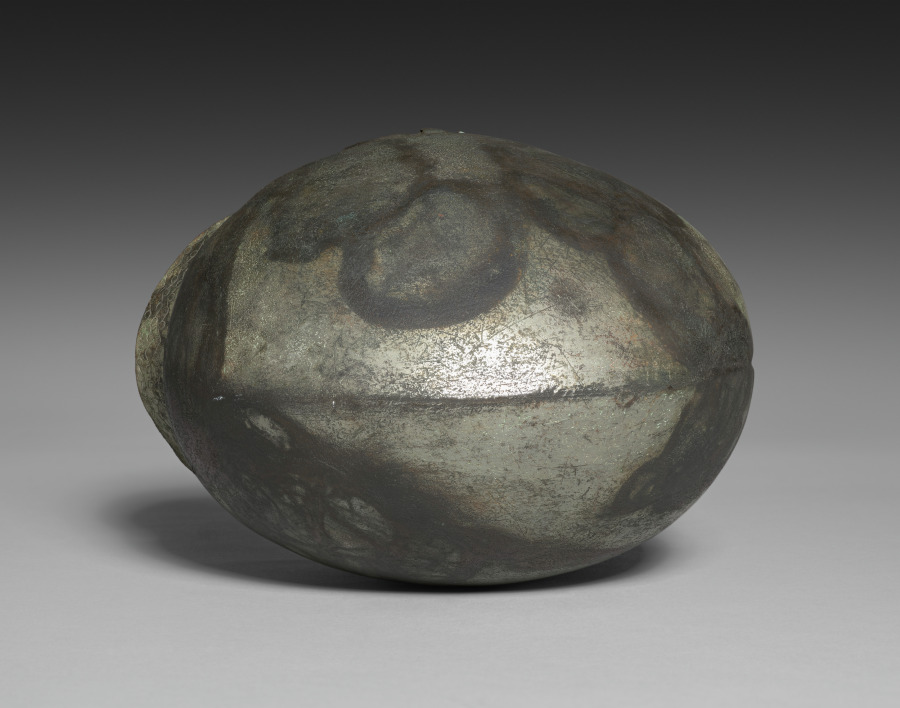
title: Chalcidian Helmet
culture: Greek (perhaps Black Sea area)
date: c. 350–200 BCE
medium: Tinned bronze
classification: Arms and Armor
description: Among ancient helmets, the Chalcidian type is varied, widespread, and comparatively unrestrictive, with relatively wide openings for the eyes and ears. This example, probably made in the Black Sea region or even further east, features a pointed noseguard, high carinated crown, molded brow ridge, and everted rear flange, plus large separately made hinged cheekpieces. The tinned bronze surface is almost silver in color, with extensive decoration including small incised linked scrolls and much larger embossed linked scrolls.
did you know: Although named for Chalcis, a city in Euboia, Chalcidean helmets were made across the Greek world.